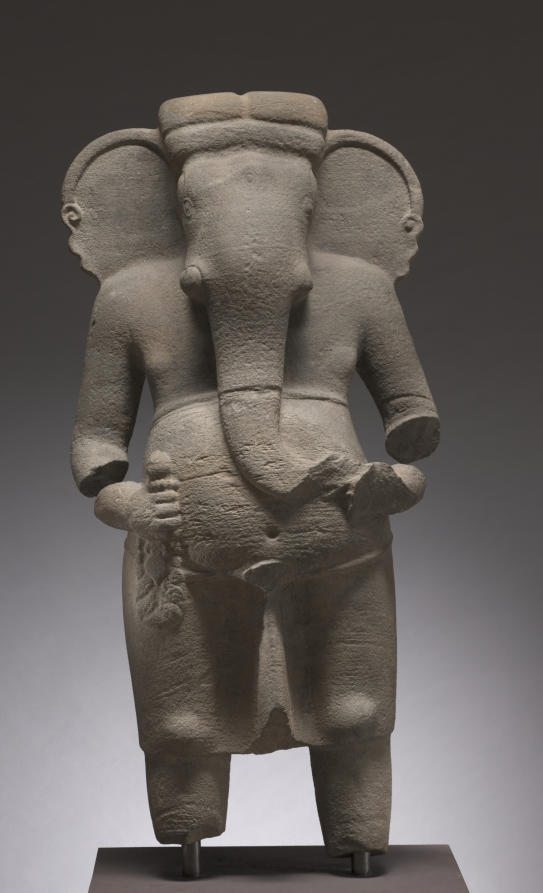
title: Ganesha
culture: Southern Cambodia or Vietnam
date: 600s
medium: sandstone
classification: Sculpture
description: Among the first Hindu deities to be venerated in the form of a large-scale stone sculpture in Southeast Asia, Ganesha presides over obstacles, either creating or removing them. At the beginning of any endeavor, to assure its success, worshipers affectionately offer him prayers and food, such as the sweet cakes and radish he enjoys in this sculpture.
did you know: Ganesha wears a short sampot held by a narrow belt.